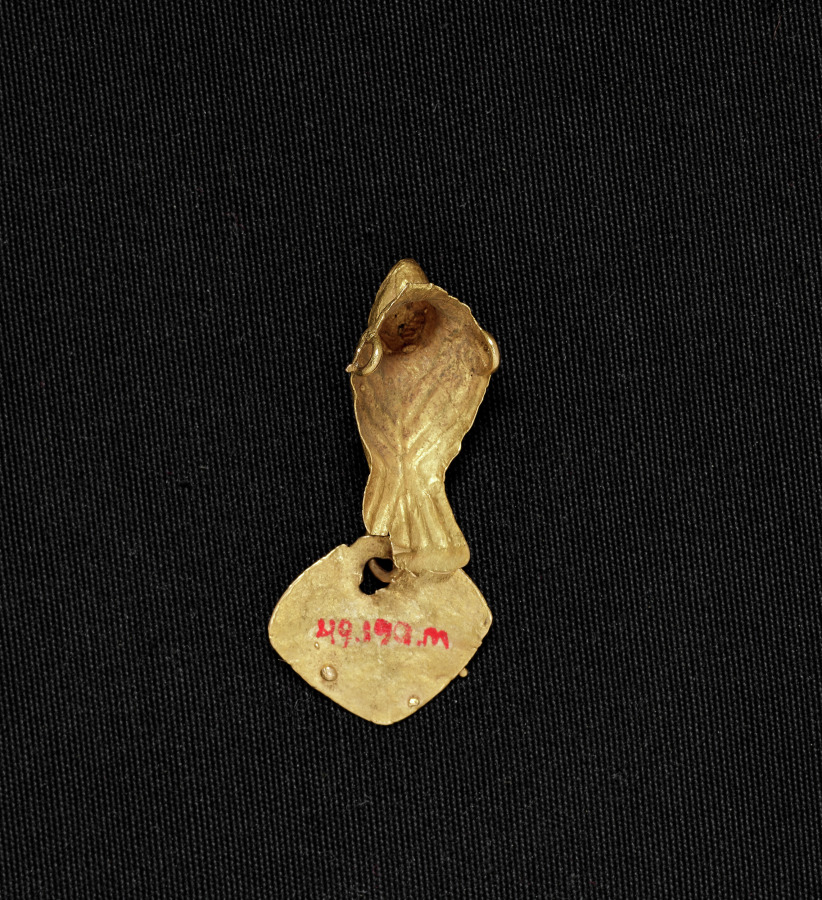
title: Bird Bead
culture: Colombia, Muisca style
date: c. 900–1550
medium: cast gold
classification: Jewelry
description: Muisca metalwork divides into two categories: ornaments to be worn, such as these, and offering figurines, in the case to the right. The elaborate bird pendant features delicate herringbone moldings, openwork patterns, and wing details-all part of the wax model from which the pendant was cast (see nearby computer animation). The dangles were attached after casting.